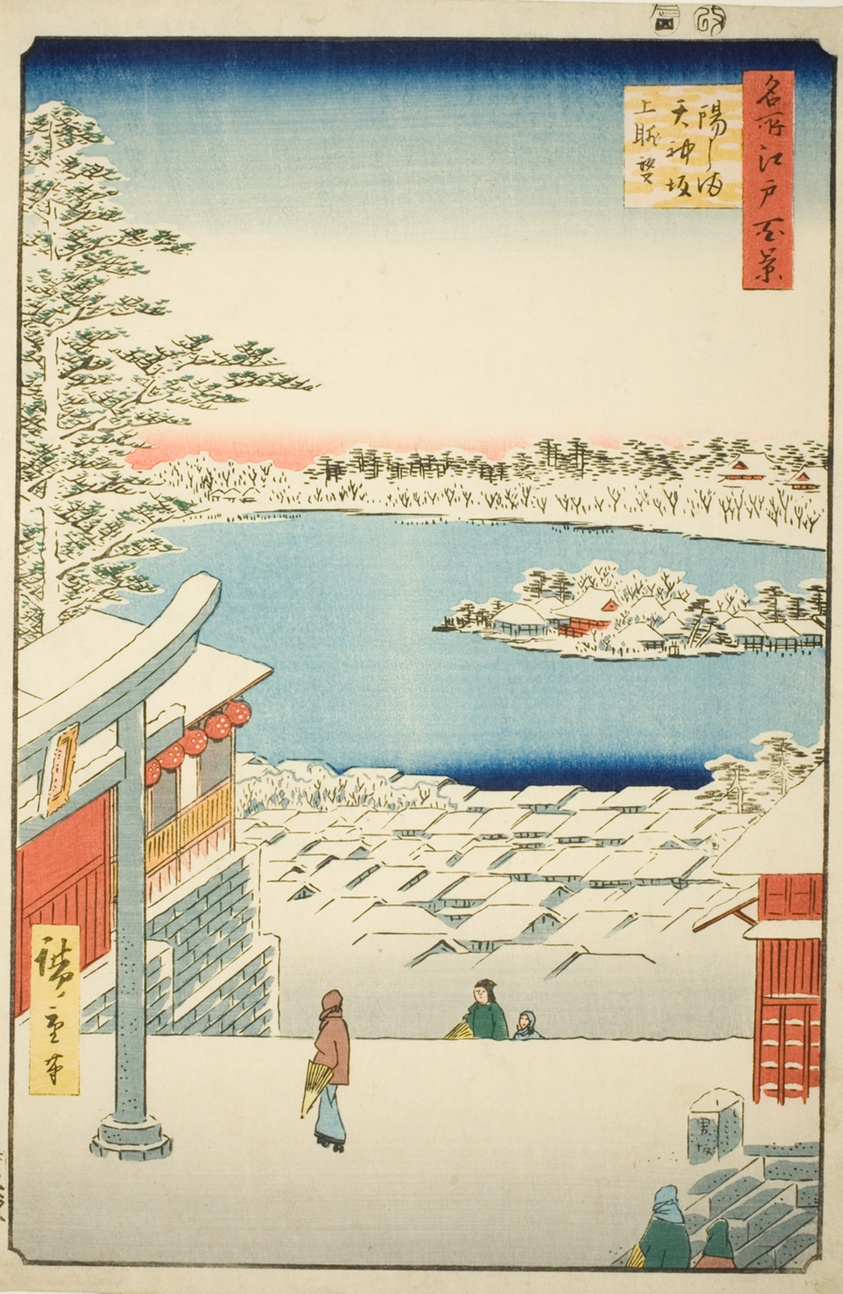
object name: Print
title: Hilltop View from Yushima Tenjin Shrine (Yushima Tenjin sakaue tenbo), from the series "One Hundred Famous Views of Edo (Meisho Edo hyakkei)"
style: Japanese (culture or style)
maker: Utagawa Hiroshige 歌川 広重; Japanese, 1797-1858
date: 1856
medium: Color woodblock print; oban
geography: Japan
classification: woodblock print; print; asian art